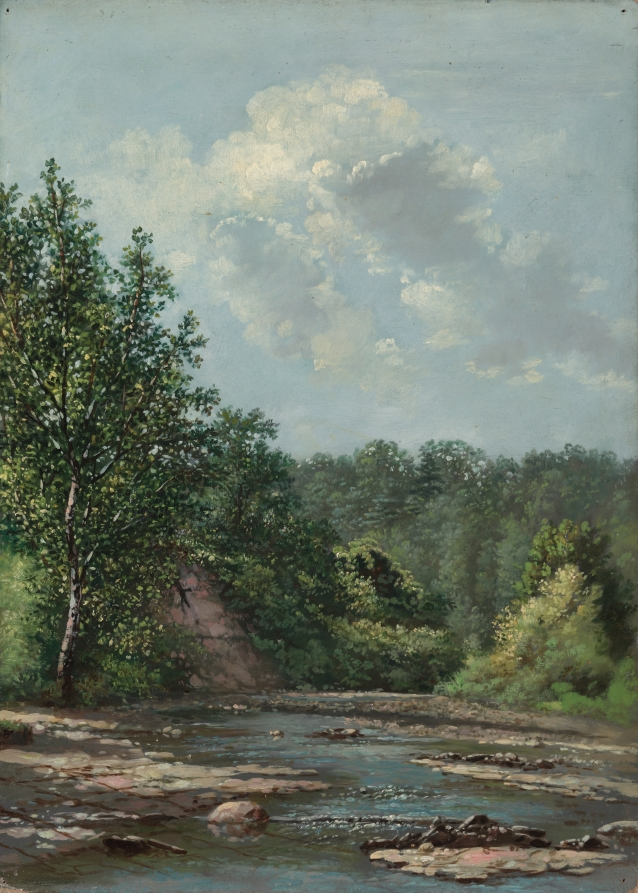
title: Landscape near Painesville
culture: America, Ohio, Cleveland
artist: Allen Smith, Jr. (American, 1810–1891)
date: c. 1880s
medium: oil on canvas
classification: Painting